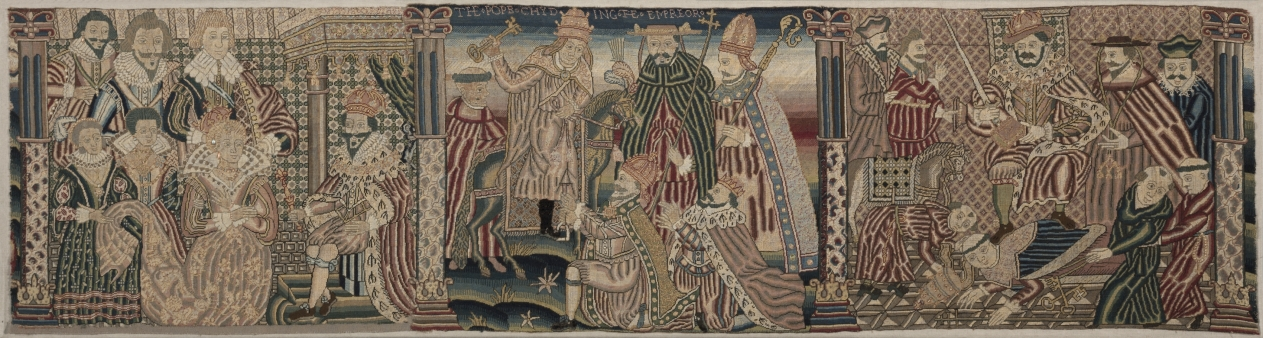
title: Section of an Embroidered Frieze: Ahasuerus and Esther, The Pope Chiding the Emperor, Henry VIII treading on the Pope's Neck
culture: England, Period of Charles I (1625-1649), 17th century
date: 1625–1649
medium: petit-point embroidery; wool and silk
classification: Embroidery